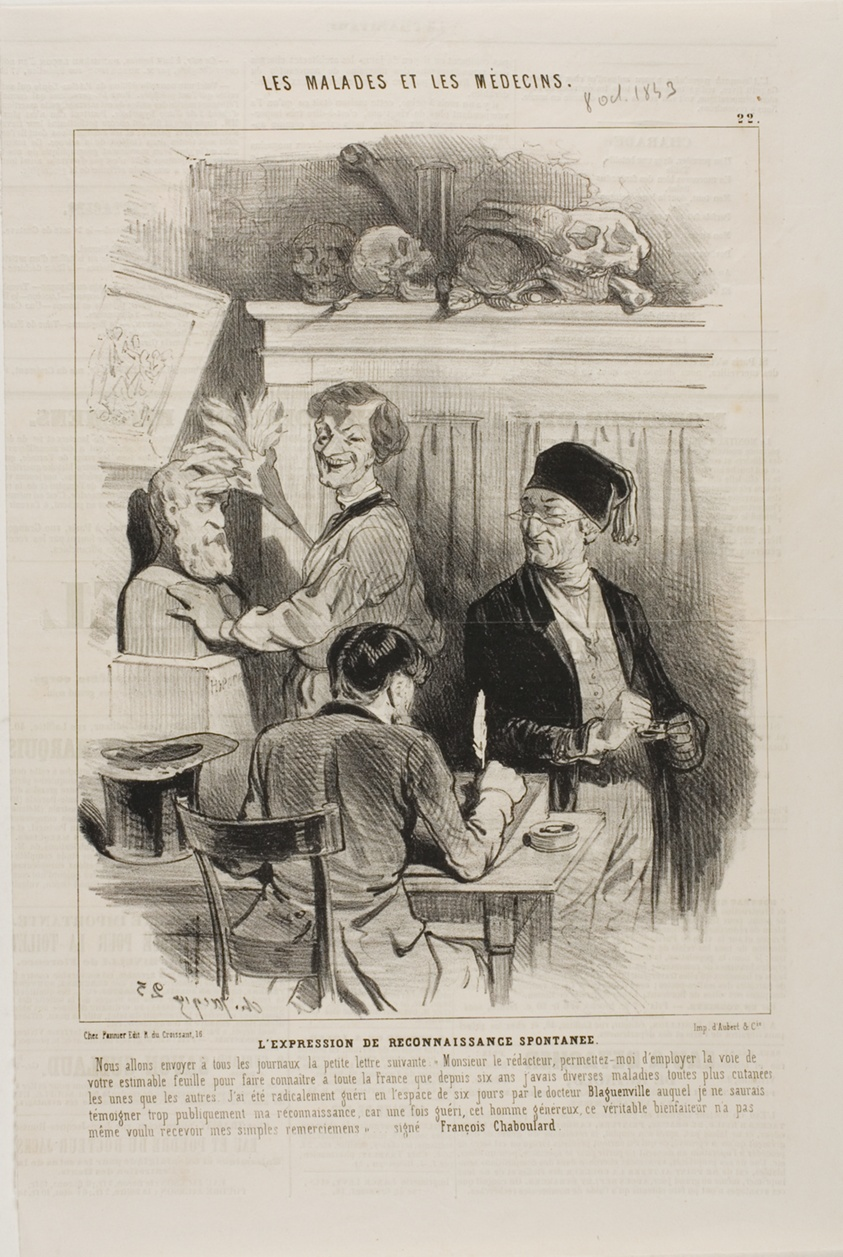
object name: Print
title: The Unsolicited Expression of Gratitude (plate 22)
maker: Charles Émile Jacque (French, 1813-1894)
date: 1843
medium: Lithograph in black on ivory wove paper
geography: France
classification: lithograph; print; prints and drawing